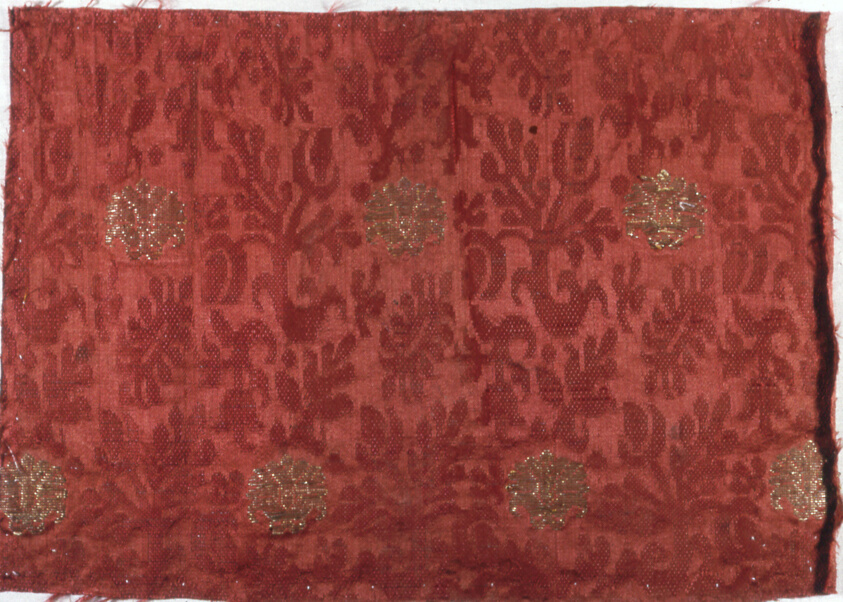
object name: Textile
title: Fragment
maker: Spain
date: Early 17th century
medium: Silk, brocaded simple satin damask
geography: Spain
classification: textile; weaving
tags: flowers